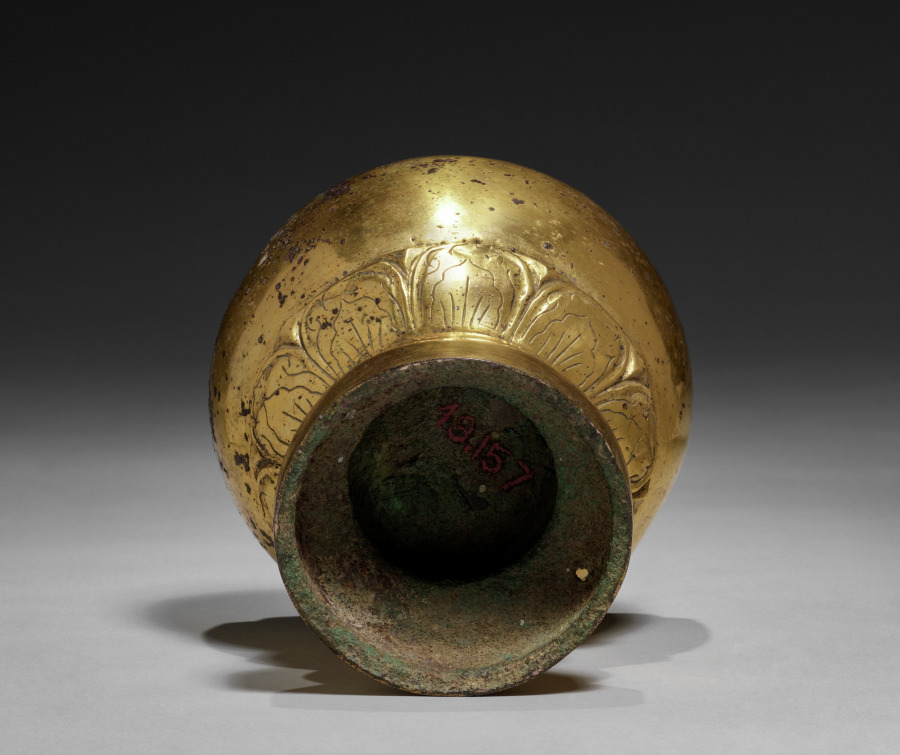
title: Censer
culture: China, Tang dynasty (618-907)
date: early 600s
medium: gilt bronze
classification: Metalwork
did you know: The censor has a lotus-shaped pedestal.